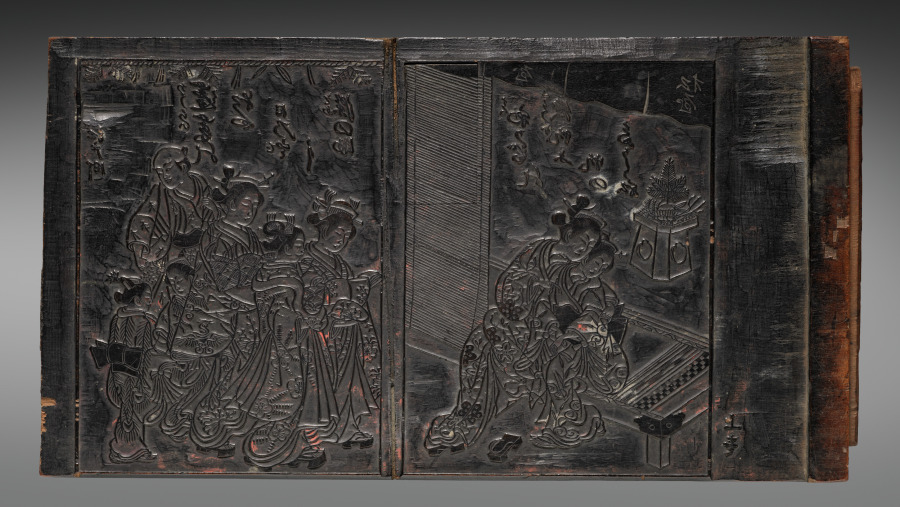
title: Print Block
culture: Japan, Edo period (1615–1868)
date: 1700s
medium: woodblock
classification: Woodblock